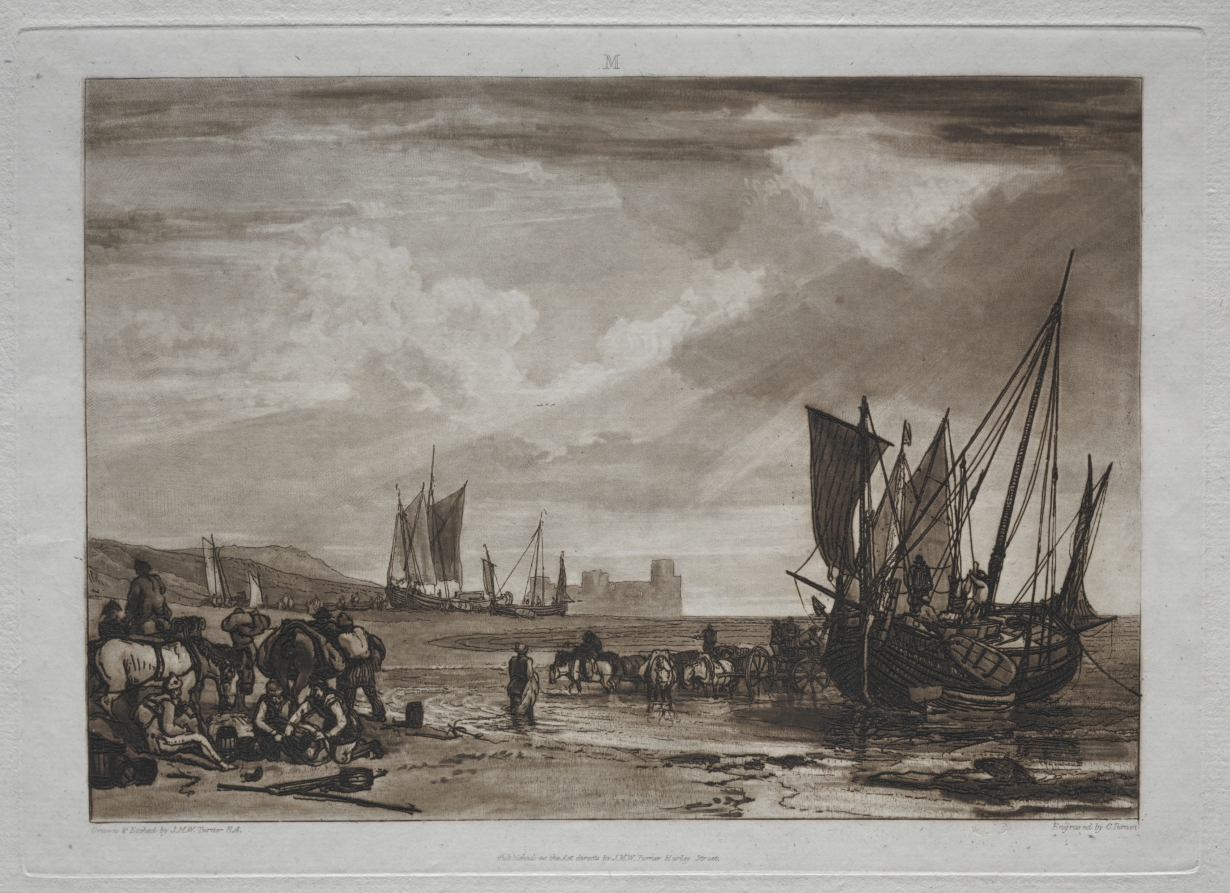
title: Liber Studiorum: Vessels Unloading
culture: England, 19th century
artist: Joseph Mallord William Turner (British, 1775–1851)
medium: etching and mezzotint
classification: Print